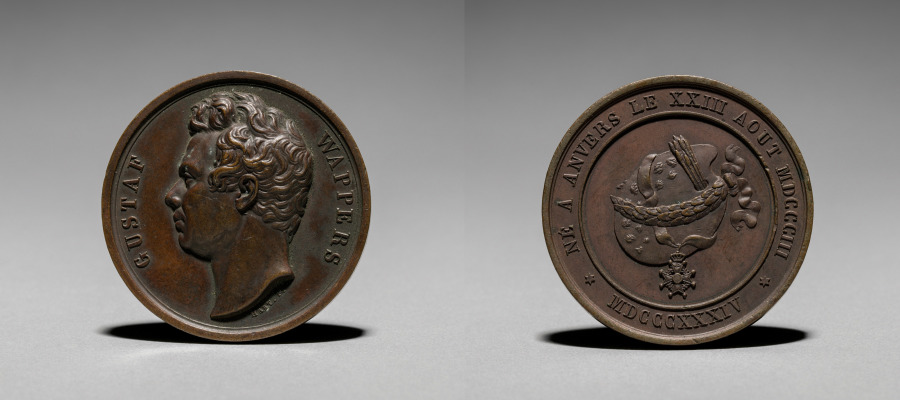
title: Medal: Gustaf Wappers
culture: 19th century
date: 1800s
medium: bronze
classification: Metalwork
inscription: "GUSTAF WAPPERS"; signed: "Hart. F."